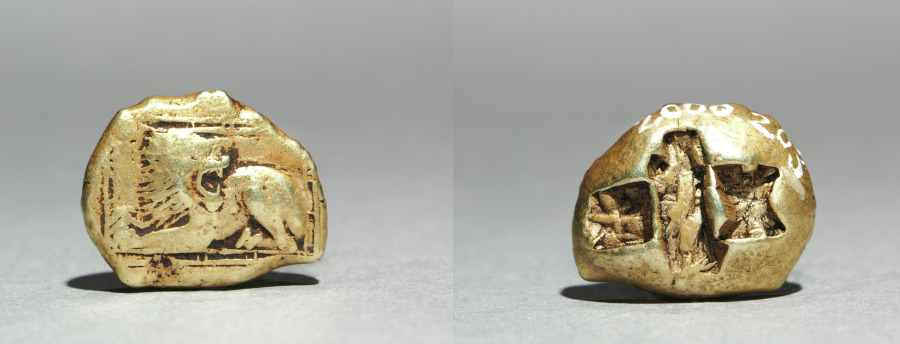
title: Stater: Lion (obverse); Incuse Punches (reverse)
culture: Greek, minted at Miletos (Ionia)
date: 600–550 BCE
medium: Electrum (gold-silver alloy)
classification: Coins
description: The lion, king of the beasts and an animal associated with regal and heroic power, featured prominently on the coinage of many ancient Greek city-states. Artists placed the lion in a variety of poses, sometimes including the whole body, at other times the foreparts or just the head. Although it may once have roamed nearby, for many Greeks the lion was a monster nearly as exotic as the Chimaera, of which it formed a part, together with a goat head and snake-headed tail.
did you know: Many early Greek coins are made from electrum, a naturally occurring alloy of gold and silver.